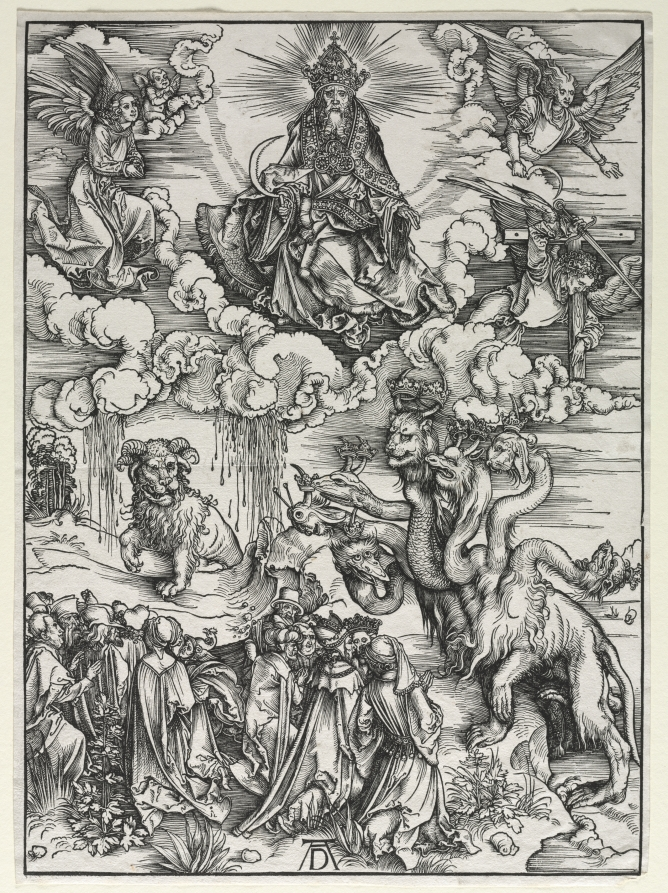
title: The Beast with Seven Heads and the Beast with Lamb's Horns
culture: Germany, late 15th-early 16th century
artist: Albrecht Dürer (German, 1471–1528)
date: c. 1496–98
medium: woodcut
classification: Print